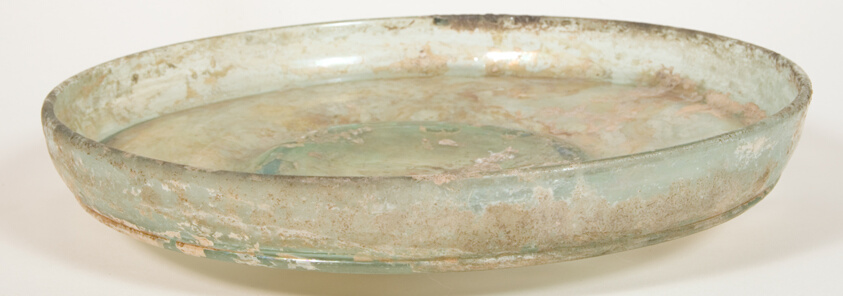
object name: Vessel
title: Plate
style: roman (ancient, style or period), ancient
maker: Roman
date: 1st-2nd century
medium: Glass, blown technique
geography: Roman Empire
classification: glass; plate (general, dish); vessel; ancient art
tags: plates